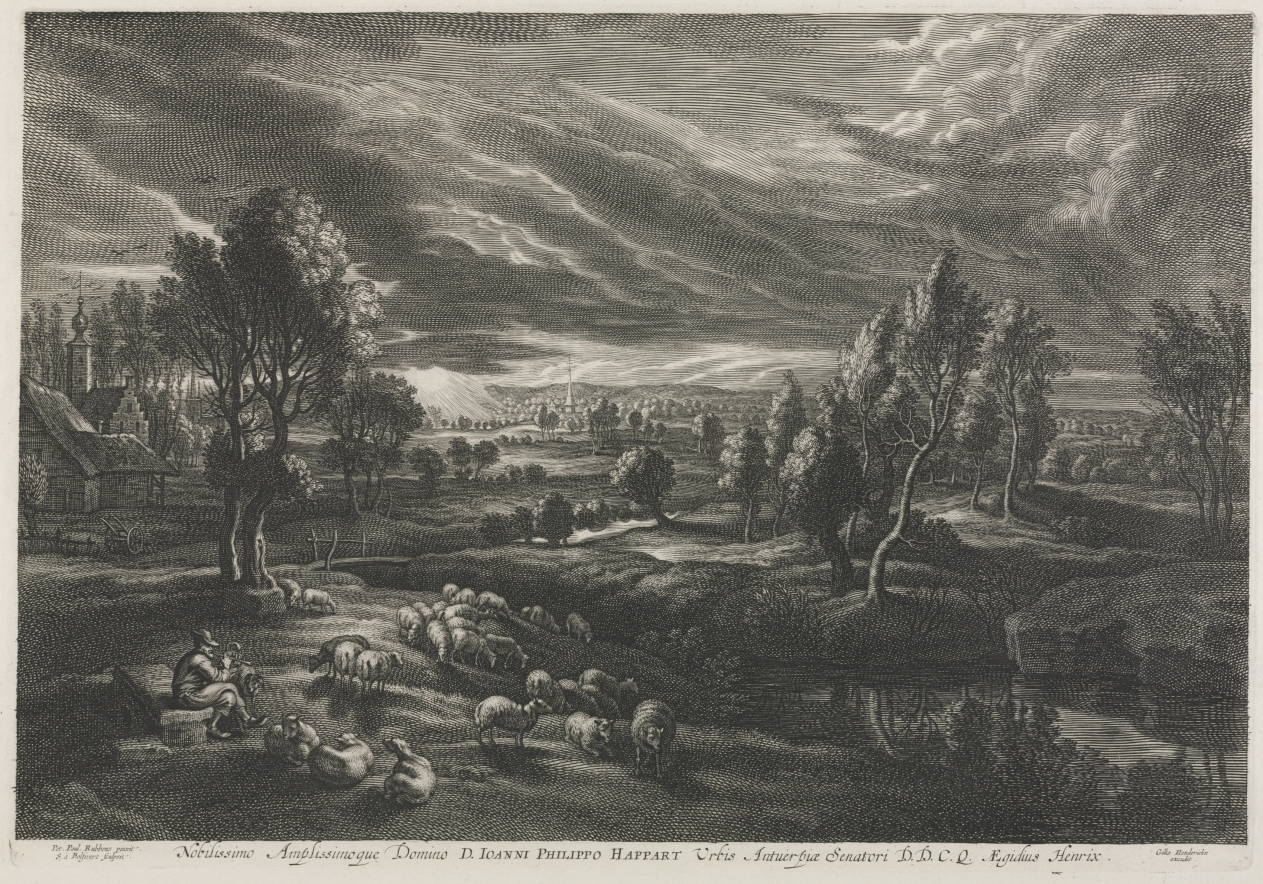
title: Landscape with Shepherd Playing a Flute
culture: Flanders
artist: Schelte Adamsz. Bolswert (Flemish, about 1586–1659)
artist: after Peter Paul Rubens (Flemish, 1577–1640)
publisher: Gillis Hendricx (undetermined, 1570-1700)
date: 1638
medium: engraving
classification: Print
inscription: across bottom in plate: Pet. Paul. Rubbens pinxit. / S. à Bolswert Sculpsit. / Noblissimo Amplissimo que Domino D. IOANNI PHILIPPO HAPPART Urbis Antwerpiae Senatori D.D.C.Q. AEgidius Henrix. / Gillis Henderickx / excudit.